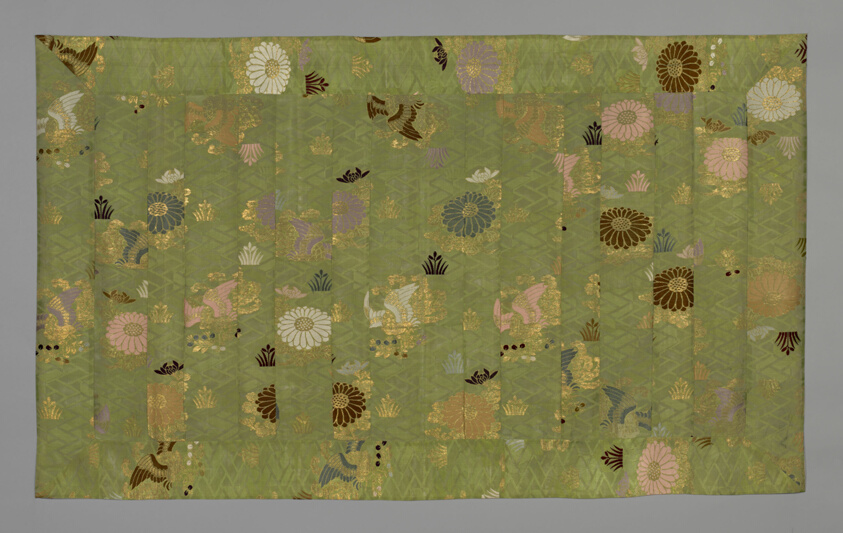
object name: Textile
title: Kesa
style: meiji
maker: Japan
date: Meiji period (1868–1912), 1870/1900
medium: Silk and gold-leaf-over-lacquered-paper strip, Plain weave with supplementary brocading wefts and self-patterned areas of 1:1 plain gauze crossings; lined with silk, plain weave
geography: Japan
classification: textile; liturgical - buddhist; weaving